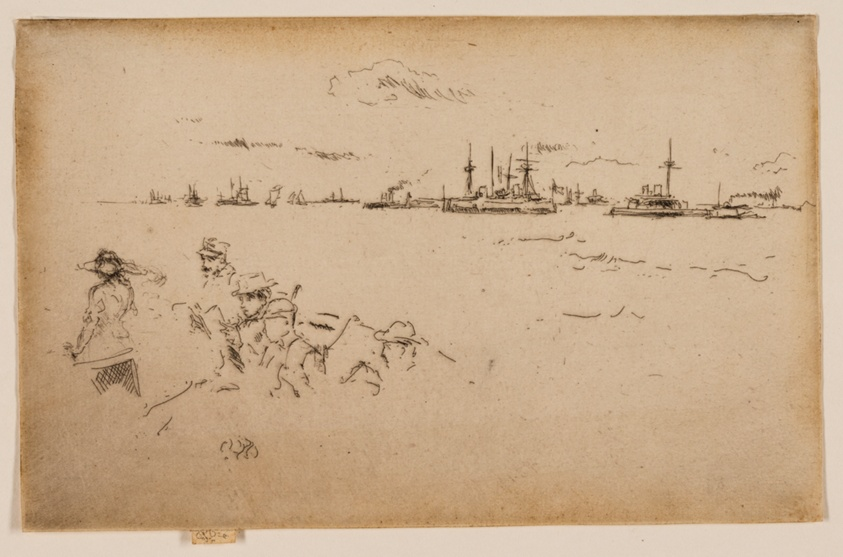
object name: Print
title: The Fleet: Monitors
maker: James McNeill Whistler (American, 1834-1903)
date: 1887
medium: Etching and drypoint with foul biting in black ink on cream laid paper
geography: United States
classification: etching; foul biting; print; prints and drawing; drypoint; paper